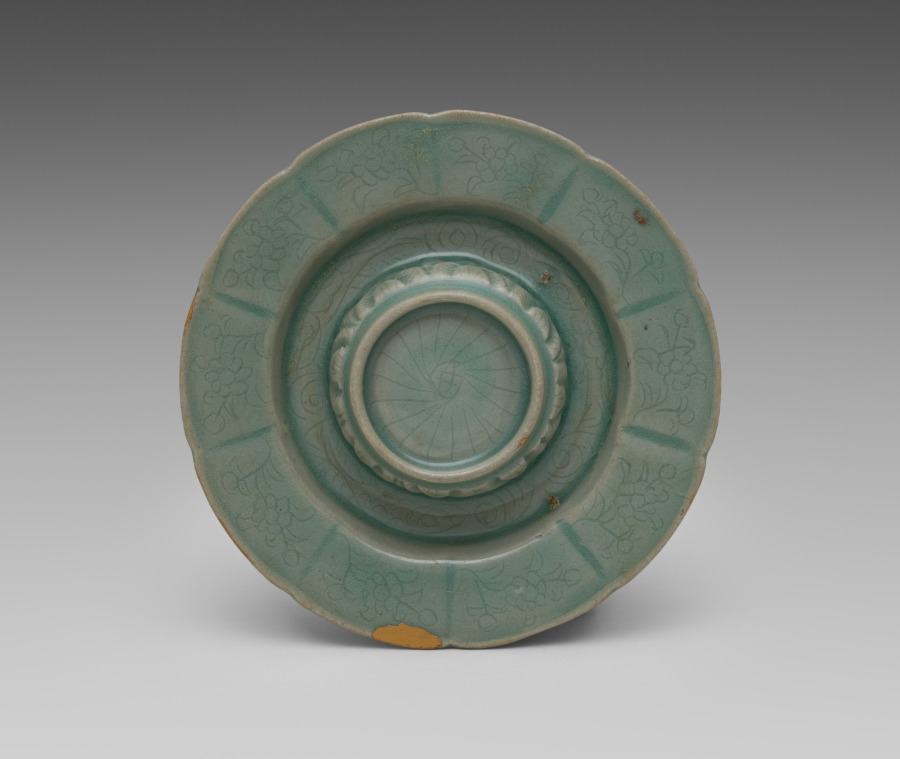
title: Floral-shaped Cup Stand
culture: Korea, Goryeo dynasty (918–1392)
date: 1100s-1200s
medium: celadon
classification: Ceramic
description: As early as the seventh century, the practice of drinking tea became an important part of elite culture in Korea. In enjoying teas, elites commissioned a variety of types of utensils and vessels including this delicate-looking cup stand, not only to make their tea-drinking experience more exciting, but also to show their refined taste.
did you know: According to a historical record, the cultivation of tea in Korea was initiated with green tea plant seeds from China by royal order in 828.